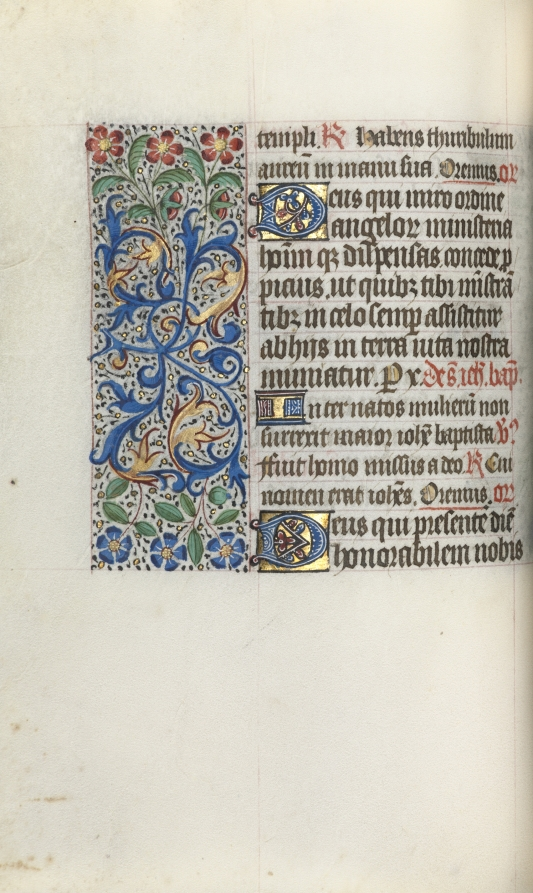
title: Book of Hours (Use of Rouen): fol. 50v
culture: France, Rouen, 15th century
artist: Master of the Geneva Latini (French, active Rouen, 1460–80)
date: c. 1470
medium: ink, tempera, and gold on vellum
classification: Bound Volume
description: In the late 1400s and early 1500s Rouen was an established and important center of book production. The city’s cathedral had a wealthy chapter that spent large sums of money to commission books and to maintain its extensive library. The stationers and booksellers would have likely been concentrated in or near the cathedral precinct. This artist, named after a manuscript now in Geneva, was Rouen’s principal illuminator during the second half of the 1400s.